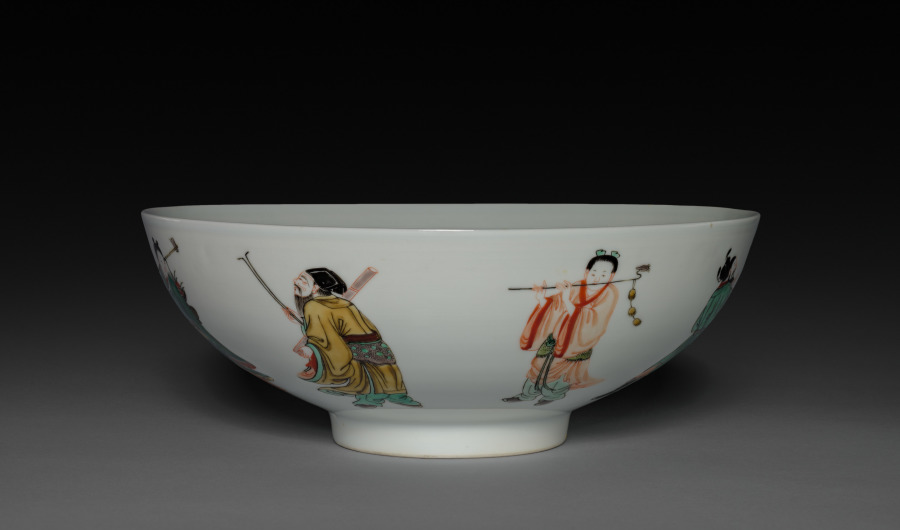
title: Bowl with Eight Immortals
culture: China, Jiangxi province, Jingdezhen kilns, Qing dynasty (1644-1911), Kangxi reign (1662-1722)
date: 1662–1722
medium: porcelain with famille verte overglaze enamel decoration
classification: Ceramic